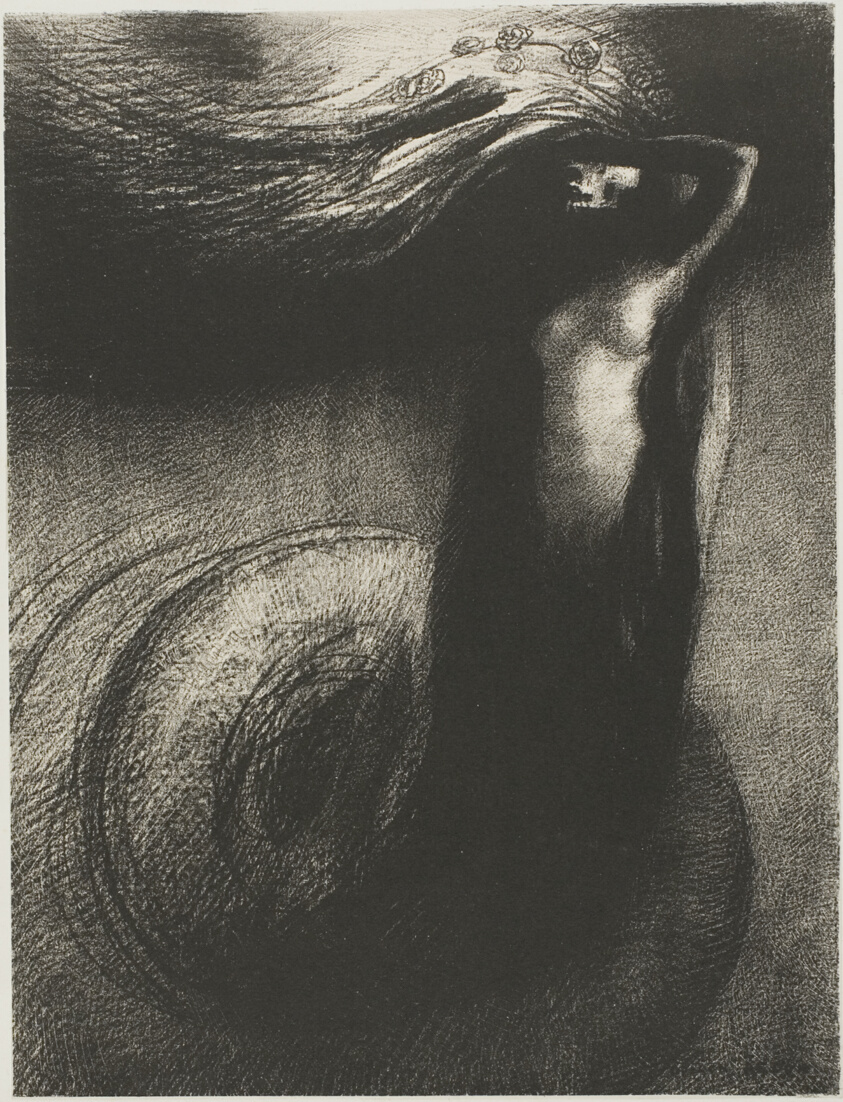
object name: Print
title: Death: "My irony surpasses all others!", plate 3 of 6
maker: Odilon Redon (French, 1840-1916)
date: 1889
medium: Lithograph in black on ivory China paper laid down on ivory wove paper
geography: France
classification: lithograph; print; prints and drawing; paper